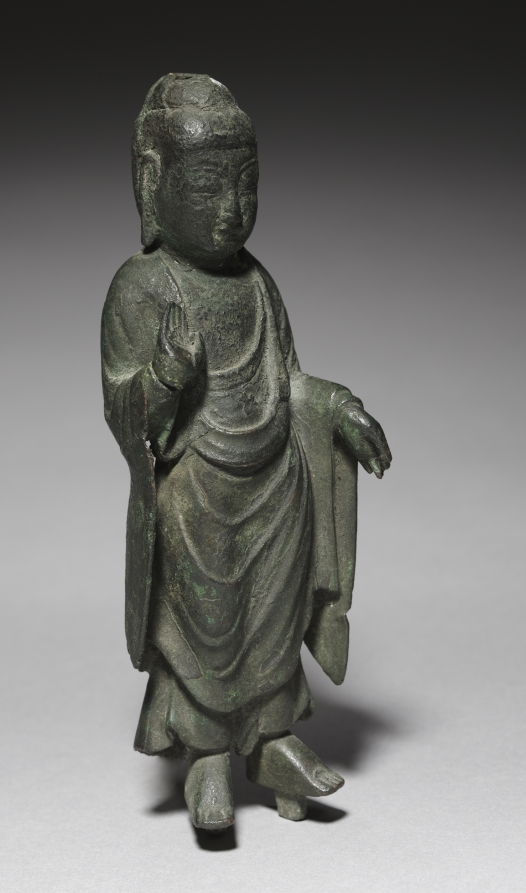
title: Standing Buddha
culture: Korea, Unified Silla period (676-935)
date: 676–935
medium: bronze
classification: Sculpture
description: This kind of miniature statue was often used as a portable object of devotion by traveling Buddhist monks.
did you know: Created during the Unified Silla period, a high point of the spread of Buddhist teachings, this kind of miniature statue was often used as a portable object of devotion by traveling Buddhist monks.